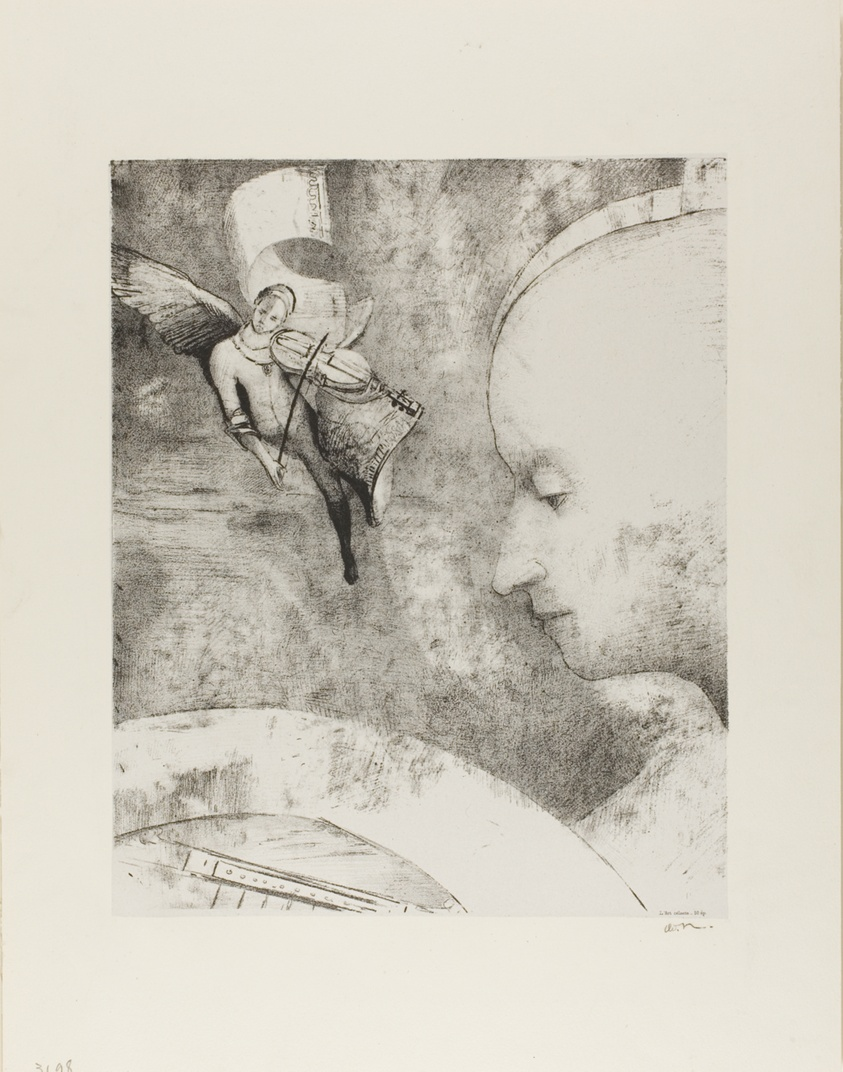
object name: Print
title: The Celestial Art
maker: Odilon Redon (French, 1840-1916)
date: 1894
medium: Lithograph in black on off-white China paper laid down on ivory wove paper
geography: France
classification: lithograph; print; prints and drawing; paper